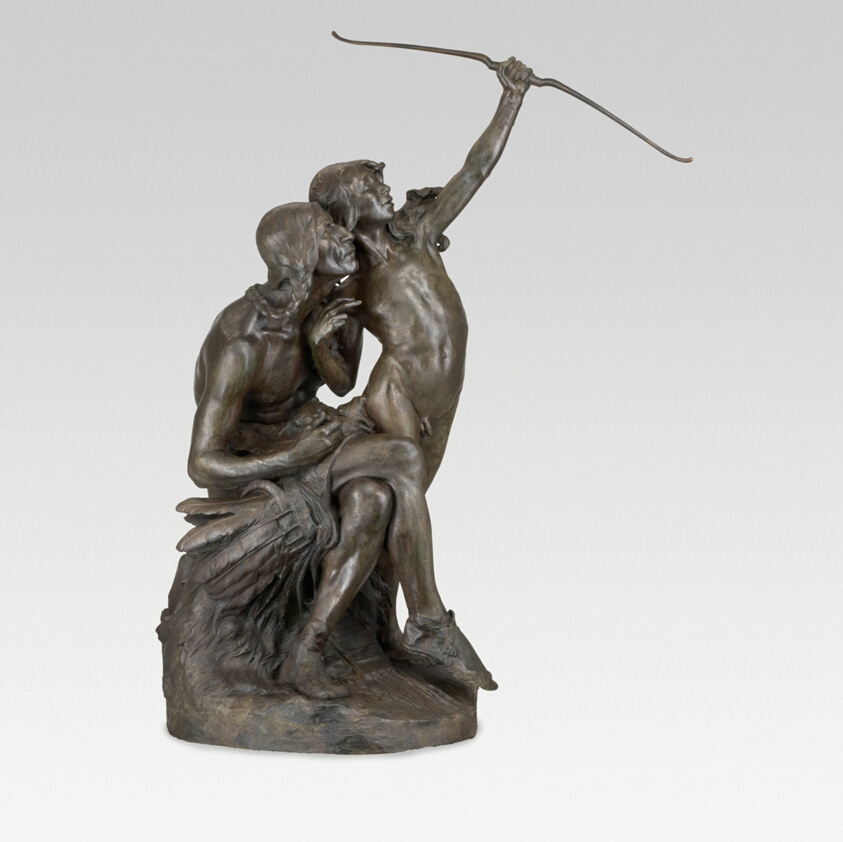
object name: Sculpture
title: The Sun Vow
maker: Hermon Atkins MacNeil (American, 1866–1947); Cast by Roman Bronze Works (American, founded 1897)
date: Modeled 1898, cast 1901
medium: Bronze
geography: United States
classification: sculpture; american arts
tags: Chicago, people, portraits